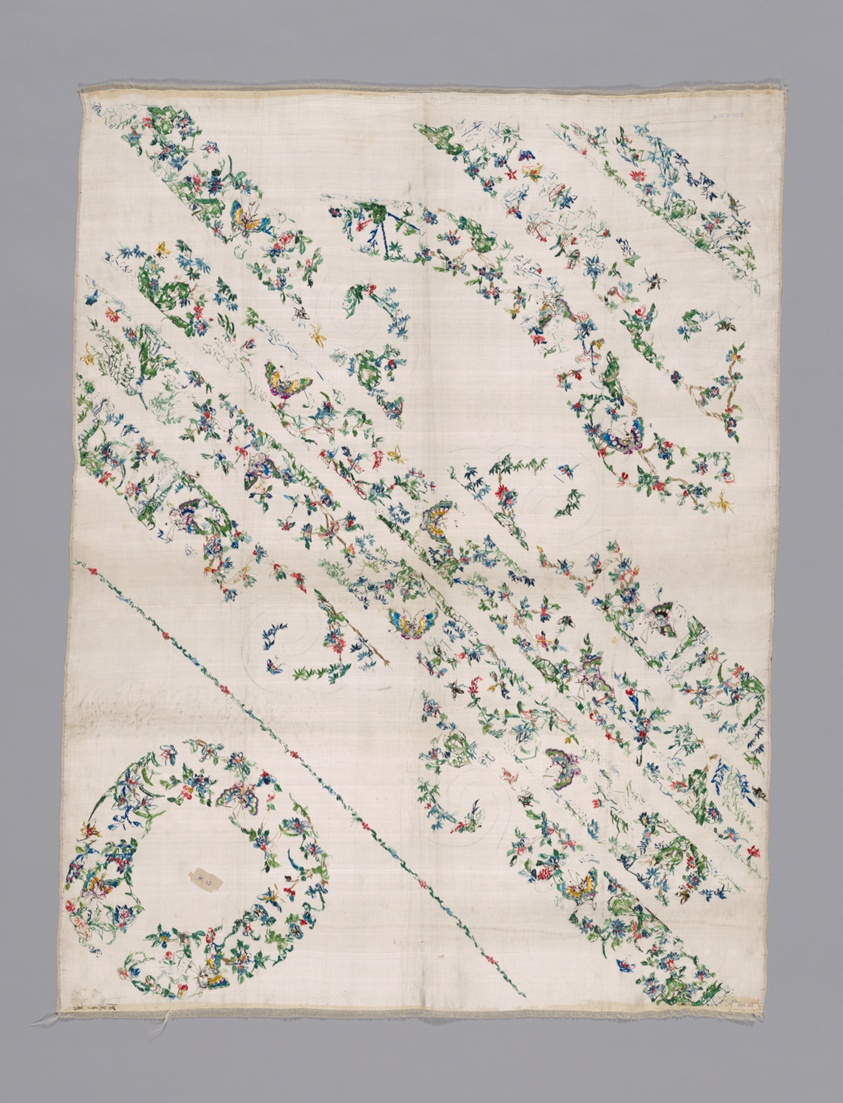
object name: Costume and Accessories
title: Embroidered Trimmings for a Woman's Ao (Short Coat)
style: han (chinese), East Asian, asian, Chinese (culture or style), qing, 19th century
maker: Han-Chinese (China)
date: Qing dynasty (1644–1911), 1875–1900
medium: Silk, warp-float faced 7:1 satin weave; ink outlines; embroidered in back, cross, eyelet, fly, knot, single satin, satin, split, and stem stitches; couching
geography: China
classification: costume - embroidery; needlework (visual works); textile; garment; clothing; coat (garment); costume - needlework; costume accessory worn above the waist; costume component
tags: floral motifs, landscape, butterflies, floral, fashion, trees, rocks